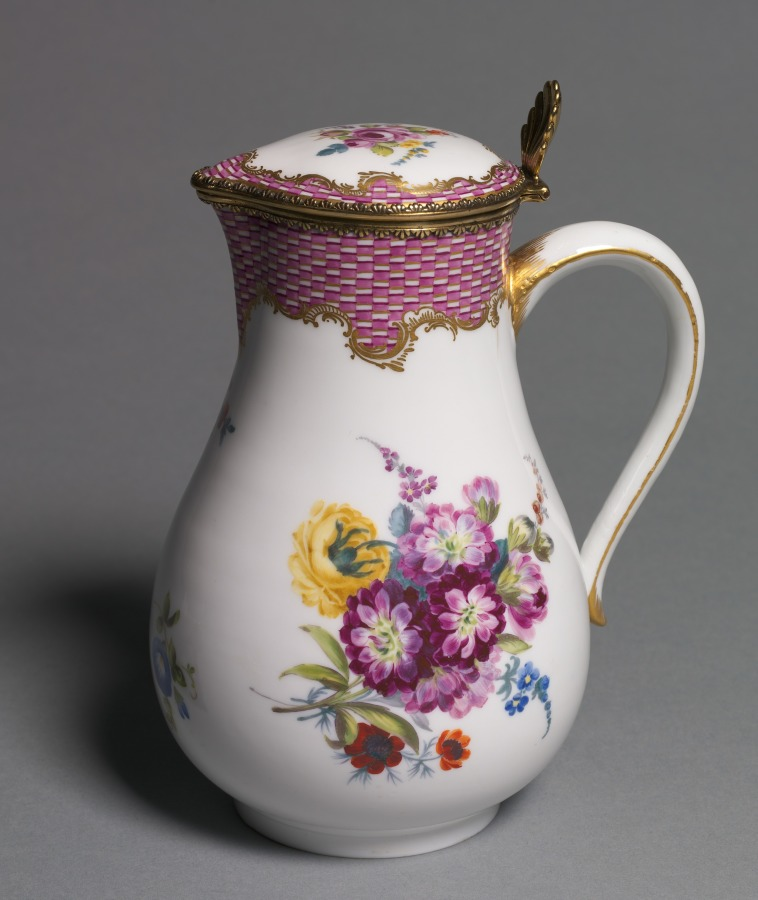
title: Covered Milk Jug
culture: Germany, Meissen, 18th century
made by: Meissen Porcelain Factory (German, est. c. 1710)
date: c. 1765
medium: porcelain with gilt metal mounts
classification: Ceramic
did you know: Milk jugs with lids or covers usually held warm milk for coffee or tea.